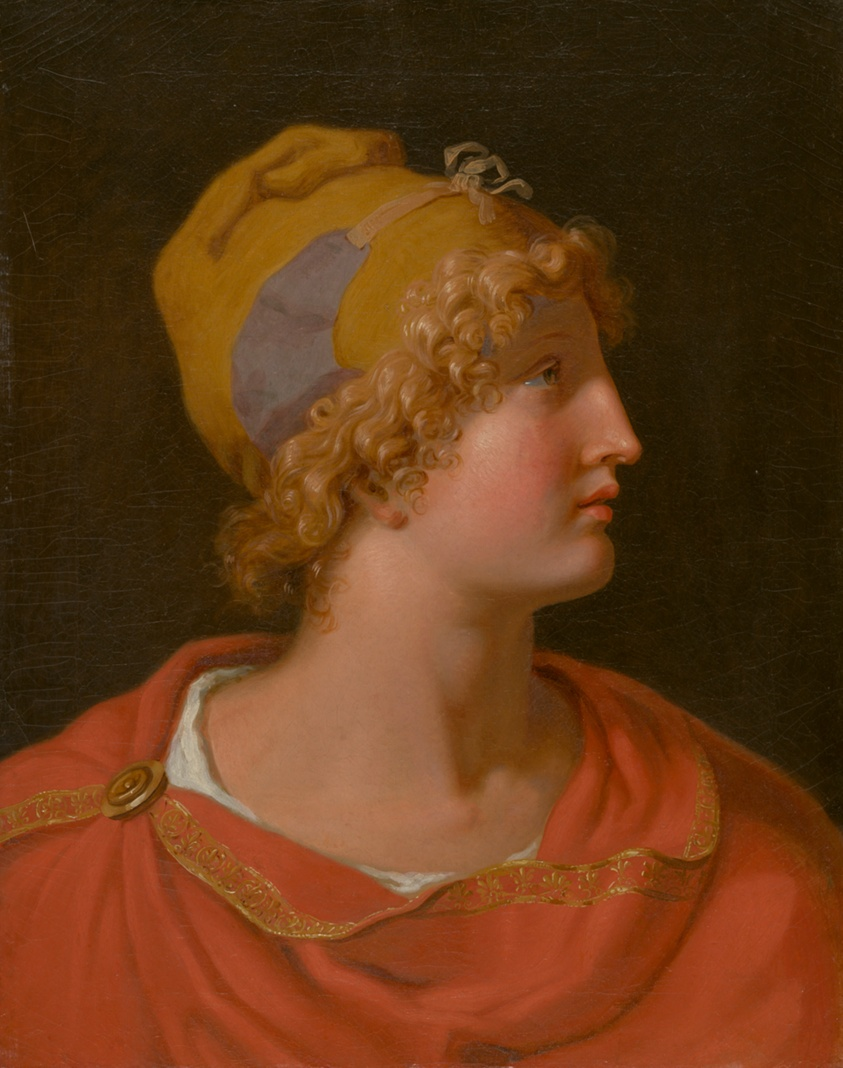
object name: Painting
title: Paris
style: 18th Century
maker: Johann Heinrich Wilhelm Tischbein (German, 1751–1829)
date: c. 1787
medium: Oil on canvas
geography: Germany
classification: painting; german; oil on canvas; paint; oil paintings (visual works); portrait; european painting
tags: Paris, Greece, Greek mythology, yellow (color), red (color), portraits: male subject, portraits, portrait, man, head, hat, gold (color)